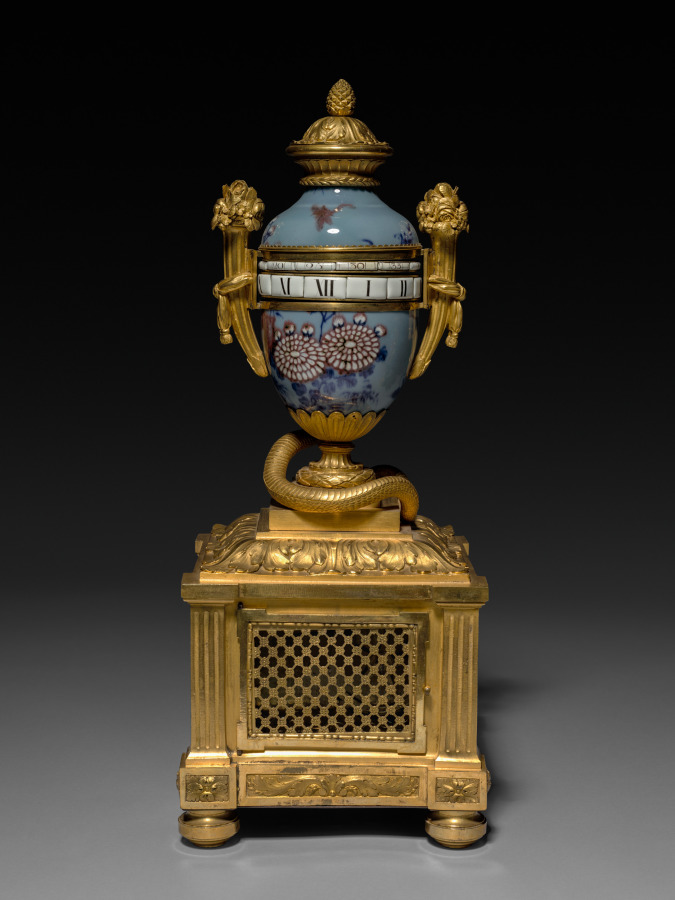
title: Garniture Set (one clock and 2 vases)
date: 1736–1770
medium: Chinese hard-paste porcelain, gilt bronze, enameled metal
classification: Furniture and woodwork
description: The fascination with Chinese porcelain among aristocratic circles increased during the reign of Louis XV. In reaction to the perceived excesses of elaborate naturalistic ornament of the 1750s, mount makers increasingly turned to neoclassical designs, known as Goût Grec (Greek taste) in the 1760s and 1770s. These beautifully chased gilt-bronze mounts feature classical Greco-Roman motifs such as lion masks, acanthus and laurel leaves, and pilasters.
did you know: A set of vases and clock, connected visually by the use of the same materials, often adorned a mantlepiece or the top of a large piece of furniture, such as a commode or console, within a room.